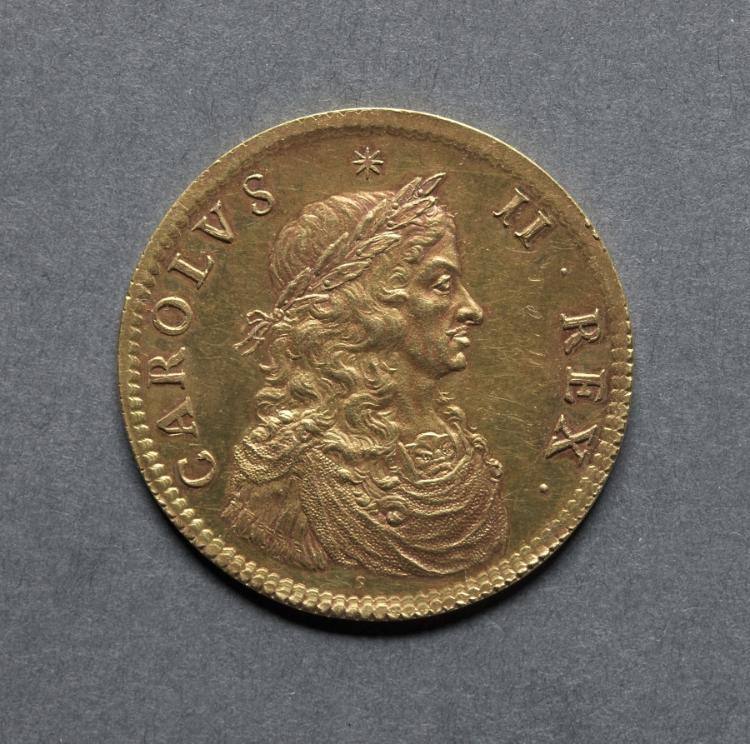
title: Broad: Charles II (obverse)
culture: England, Charles II, 1660-1685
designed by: Thomas Simon (British, c. 1623–1665)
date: 1660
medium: gold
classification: Coins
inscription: CAROLVS * II . REX .